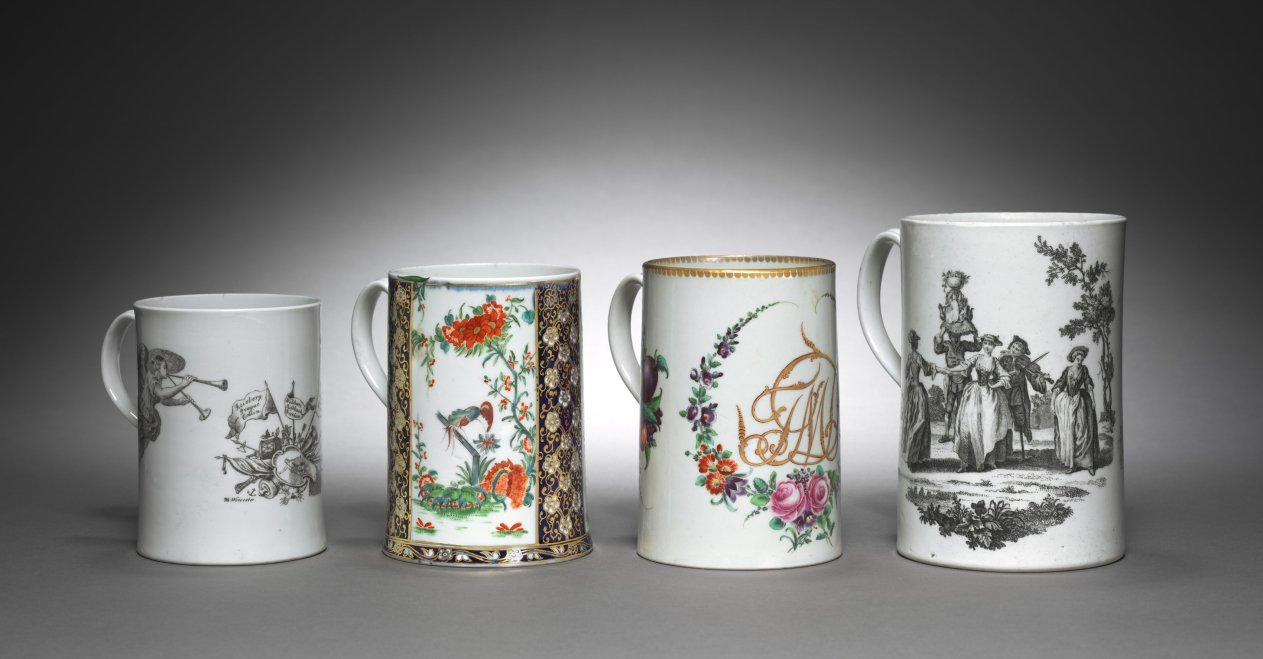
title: Cann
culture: England, 18th century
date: c. 1770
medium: ceramic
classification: Ceramic